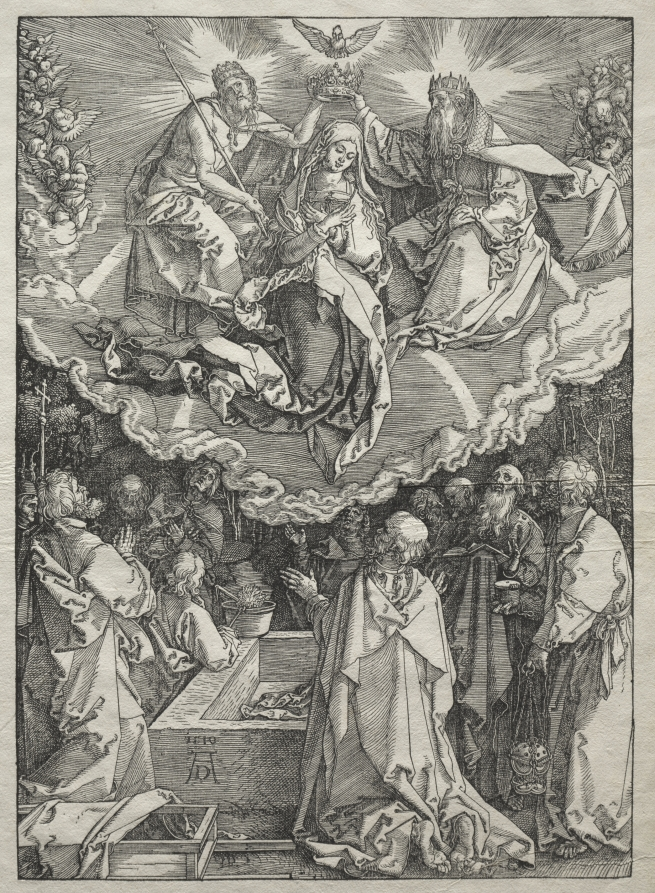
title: Life of the Virgin: Assumption of the Virgin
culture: Germany, early 16th Century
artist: Albrecht Dürer (German, 1471–1528)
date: 1504–1505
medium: woodcut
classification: Print